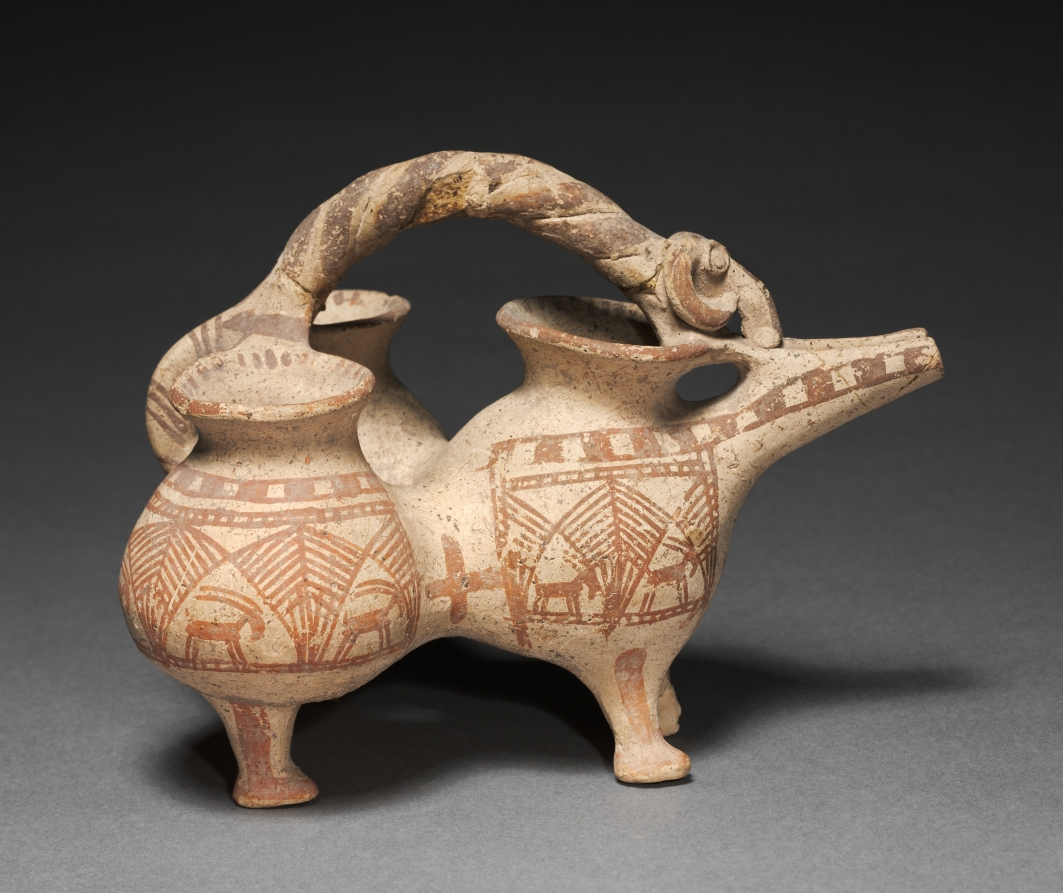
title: Three-Part Pitcher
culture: Iran, Luristan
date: c. 800–700 BCE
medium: earthenware, unglazed slip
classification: Ceramic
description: This unusual tripartite pitcher is made of three jugs joined together, a twisted handle, and a ram’s head atop a spout. Four feet connect to the pitchers, adding stability and an animal-like form. Ibexes, diamonds, and crosses, all painted in red slip, decorate the clay surface. This work is likely Baba Jan III ware from the Iron Age site Baba Jan in northwestern Iran. The pitcher is functional but may have served a ritual purpose.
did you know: The ram’s head was created separately before being attached to the spout.